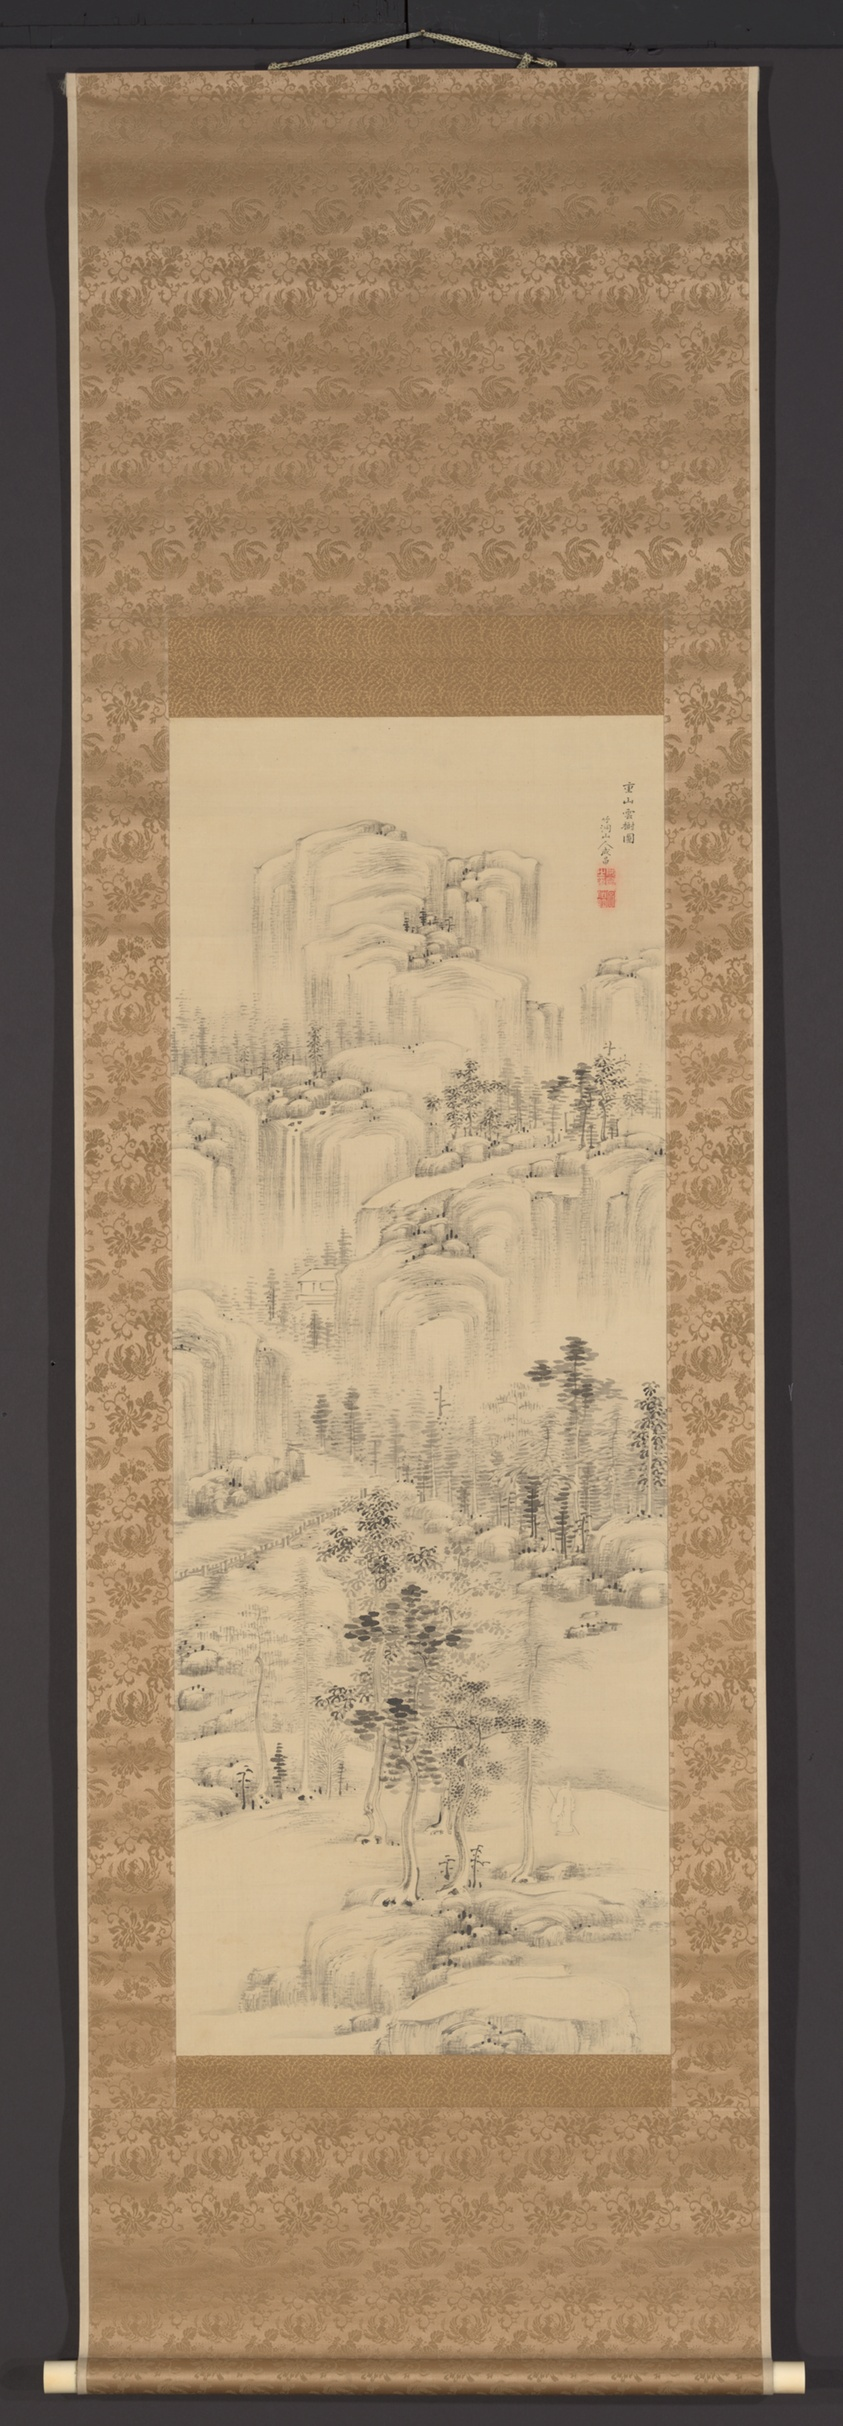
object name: Painting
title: Trees in the Clouds on Layered Mountains (Jûzan umbokuzu)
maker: Nakabayashi Chikutô (Japanese, 1776–1853)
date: 1853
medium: Hanging scroll; ink on silk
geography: Japan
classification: hanging scroll; painting; asian art